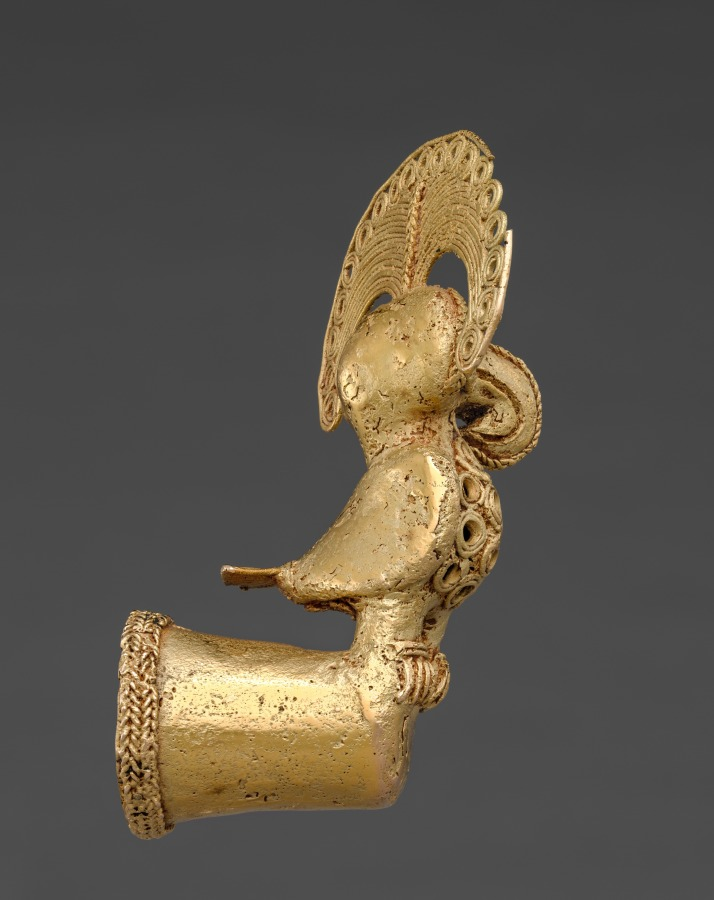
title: Finial with Bird (Harpy Eagle with Royal Flycatcher Crest?)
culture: Isthmian Region (Colombia), Sinú (Zenú), 5th century-11th century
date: 400–1000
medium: gold, cast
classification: Metalwork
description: This gold finial fit over the end of a staff, an emblem of rank. The bird has the hooked beak of a raptor—perhaps the harpy eagle, the “king” of tropical forests. The enormous crest, however, may be inspired by the Royal Flycatcher, a smaller bird that fans its unique, brilliantly colored crest during mating.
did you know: A museum visitor corrected our identification of this bird!